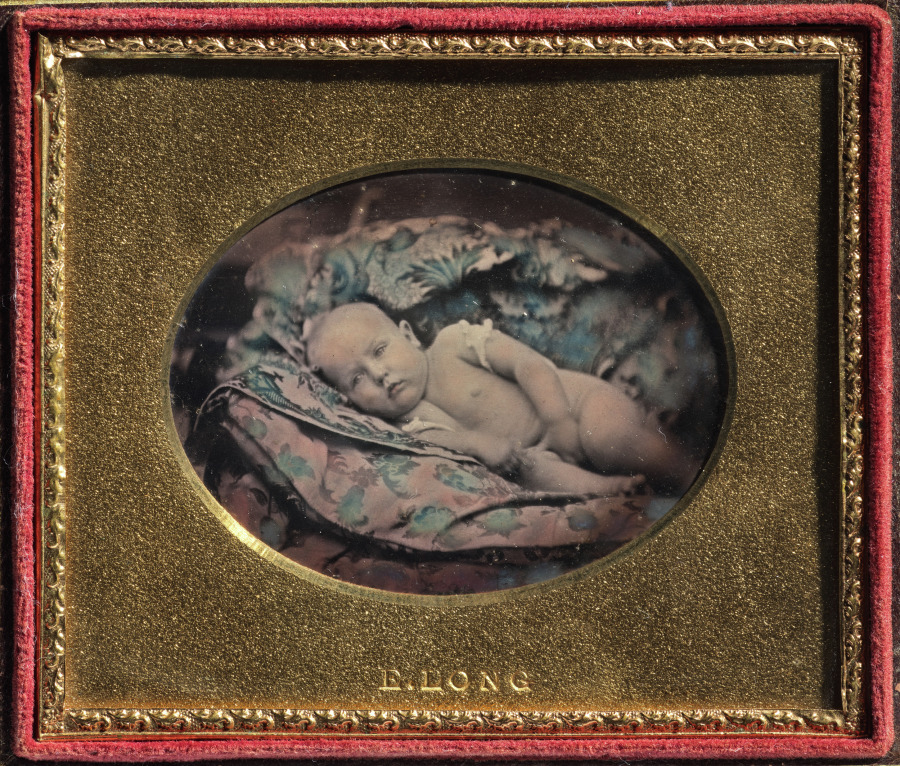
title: Alice Montgomery (1850-1917)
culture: America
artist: Enoch Long (American, 1823–1898)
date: 1850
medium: daguerreotype, applied color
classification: Photograph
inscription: Written in black ink on enclosed paper: "Alice Montgomery / 1850-1917"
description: Children have always been particularly cherished subjects for photography. Portraits were made to preserve the memory of their stages of growth and, in an age when long-distance travel was rare, to share with faraway relatives. And, for a sadder reason: in 1840 an estimated one-third of children died before age five. Photography offered grieving parents the opportunity to immortalize their children’s features. This tragic genre of photographs, later called “post-mortems,” often depicts the children in fine clothing, laying down with eyes shut, as if merely napping.